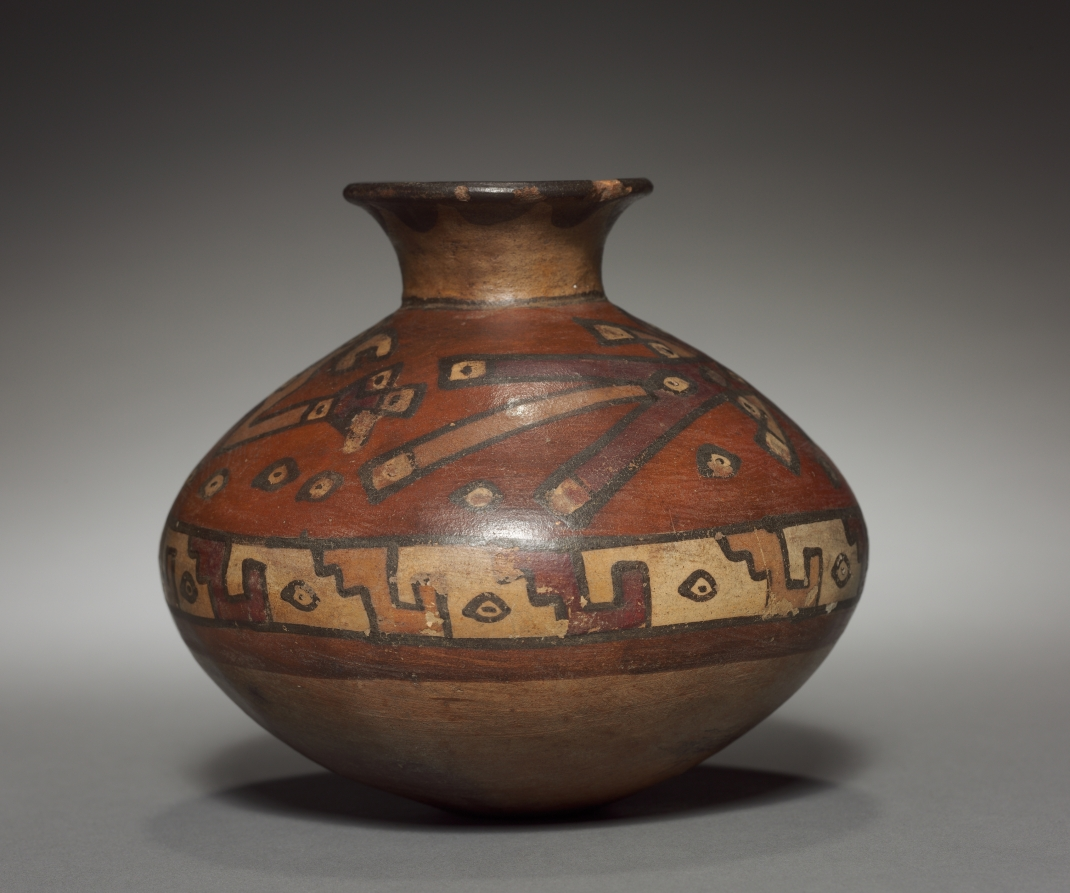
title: Vessel with Bird Designs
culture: Peru, South Coast, Middle Horizon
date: 700–1000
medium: pottery with burnished, colored slips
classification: Sculpture